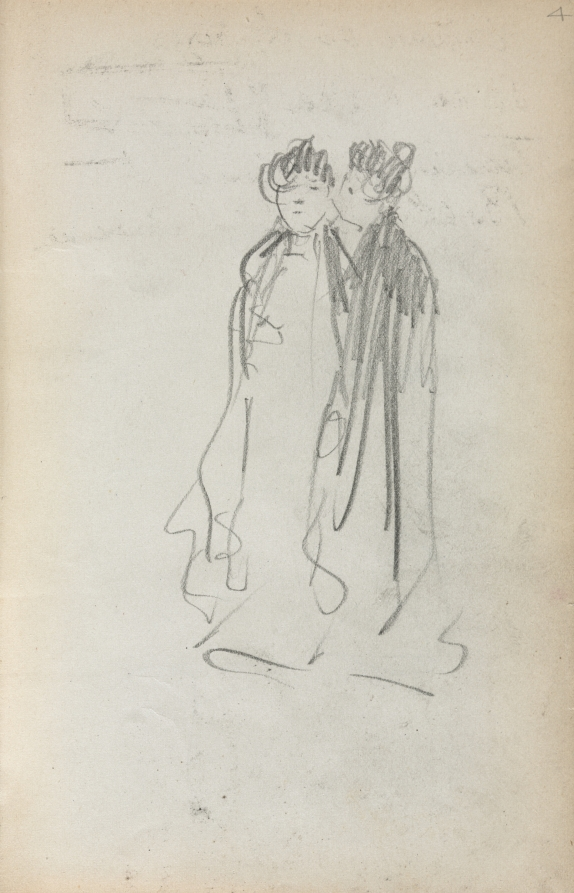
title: Italian Sketchbook: Two Standing Women (page 4)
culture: America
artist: Maurice Prendergast (American, born Newfoundland [now Canada], 1858–1924)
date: 1898–1899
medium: pencil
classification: Bound Volume